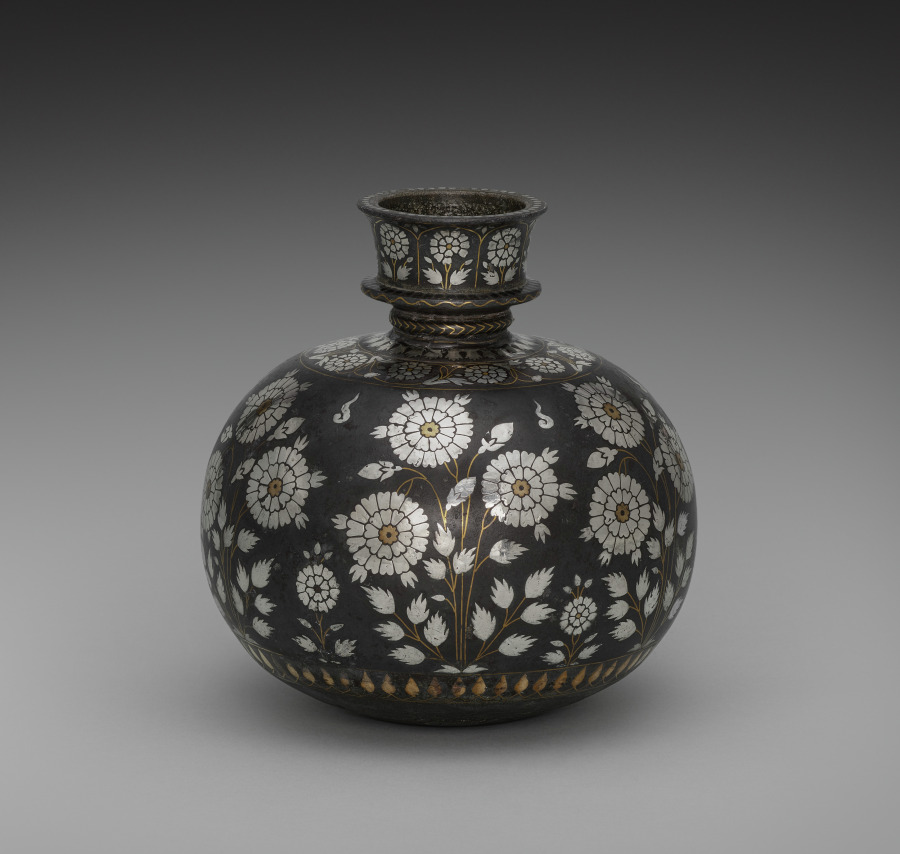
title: Bidri Hookah Bowl with Roses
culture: Southwestern India, Deccan, Karnataka, Bidar​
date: c. 1650s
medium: Zinc alloy with silver and brass inlay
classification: Metalwork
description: Hookah bowls were used for the enjoyment of tobacco or any other smoked substance during moments of relaxation. They were also aesthetic objects to be admired in elite gatherings of connoisseurs. The flowering rose bushes on this fine early example, made shortly after the introduction of tobacco-smoking in India, would have called to mind celebrated poetical works, such as the Gulistan (Rose Garden) of Sa'di (Persian, 1210–1291 or 1292).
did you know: Bidri ware is cast from condensed vapors of zinc mined from Sawar in Rajasthan.